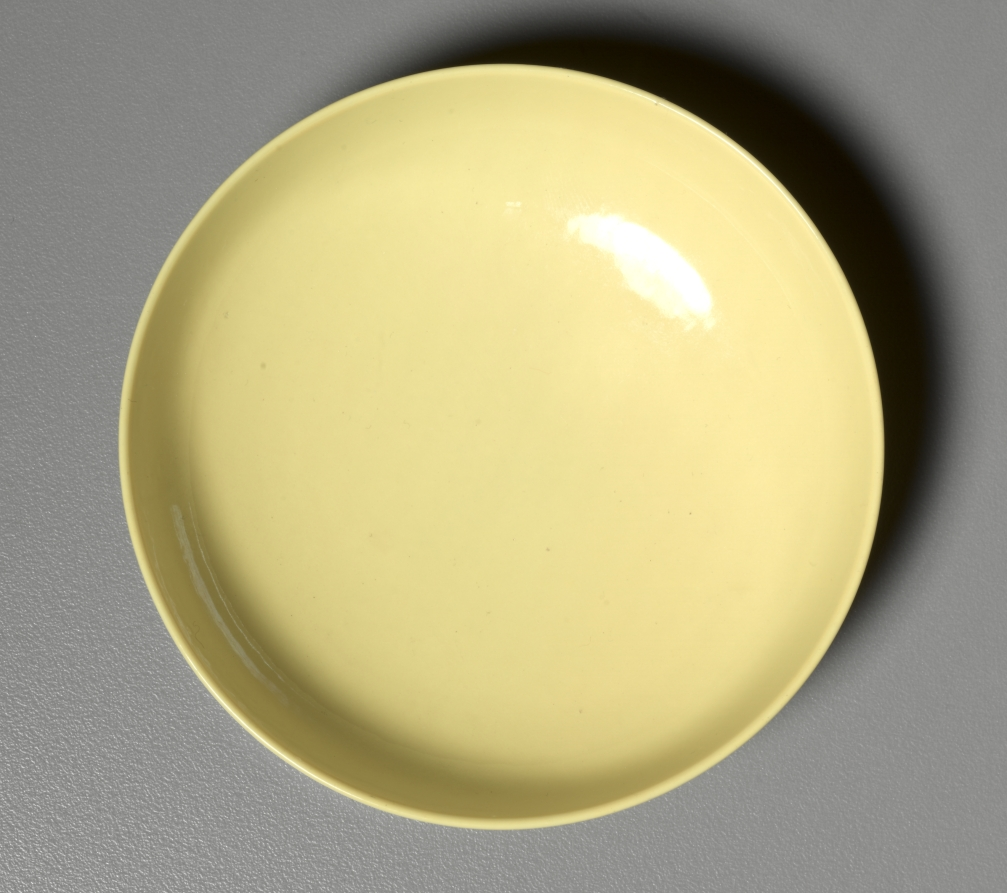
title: Small Dish with Yellow Enamel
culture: China, Qing dynasty (1644-1911), Qianlong mark and reign (1735-1795)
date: 1736–95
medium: enameled porcelain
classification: Ceramic